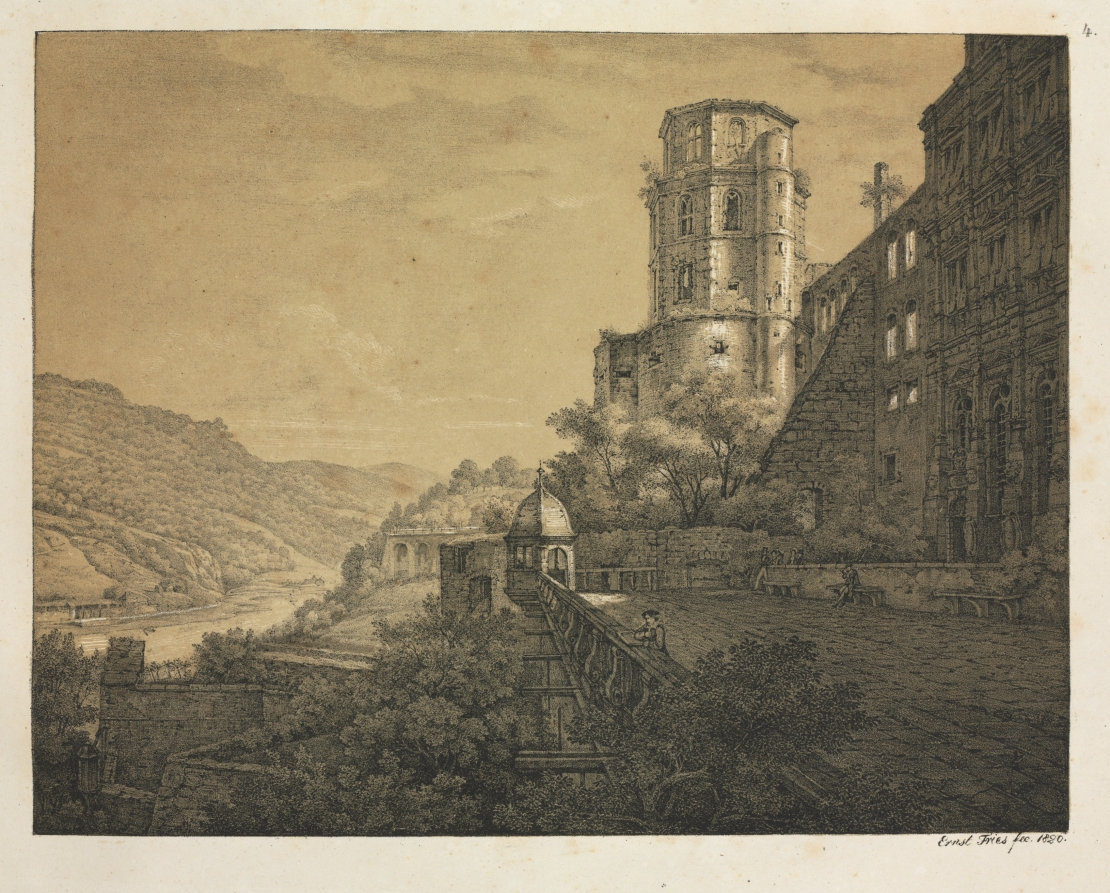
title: Six Views of Heidelberg Castle: Yard, at the Entrance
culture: Germany, 19th century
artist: Ernst Fries (German, 1801–1833)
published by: Mohr & Winter, Heidelberg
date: 1820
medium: lithograph printed in black and two tint stones: pale ochre overall and dark ochre/warm grey selectively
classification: Print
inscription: Inscribed in graphite upper right: 3; lower right margin: Das Heidelburger Schloss gegen den Eingang